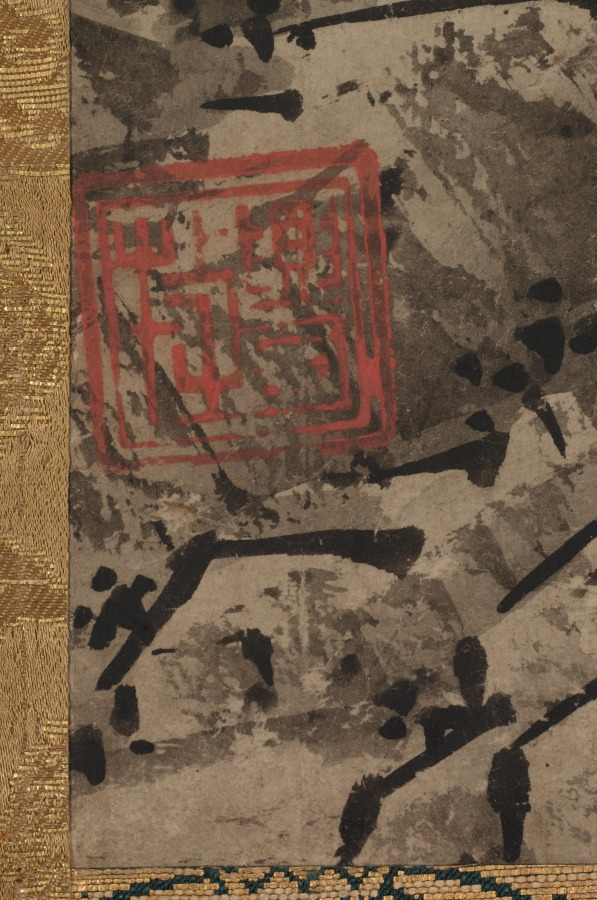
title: Female Daoist Figure in Landscape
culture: Japan, Muromachi period (1392–1573)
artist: Kōboku (Japanese)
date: early 1500s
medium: hanging scroll; ink on paper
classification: Painting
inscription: 「興牧」（朱文方印）